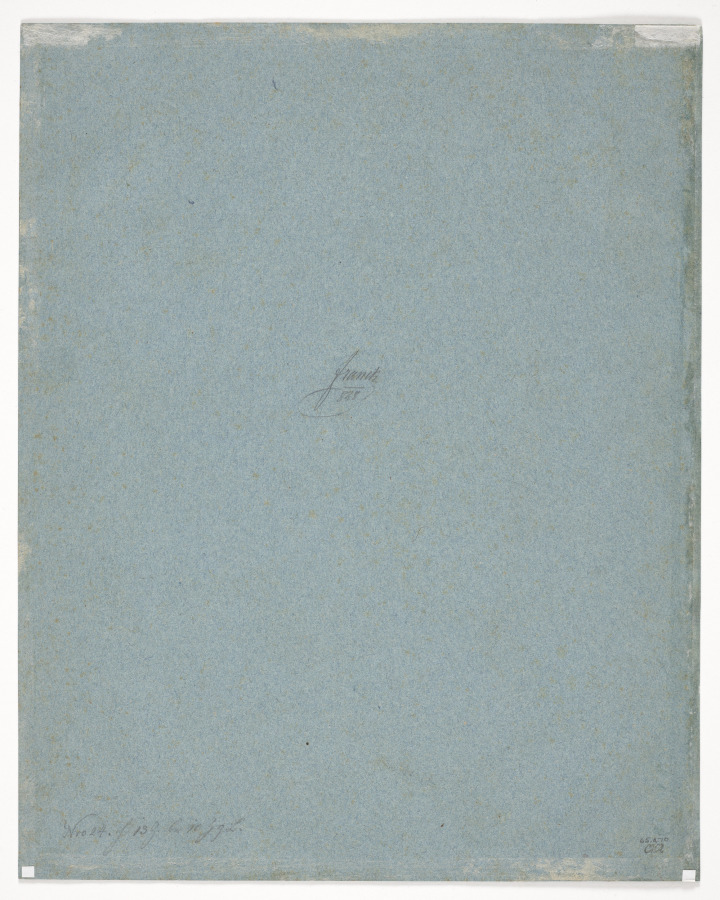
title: Arm of Eve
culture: Germany, Nuremberg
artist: Albrecht Dürer (German, 1471–1528)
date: 1507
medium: point of brush and gray and black wash, brush and gray and black wash, heightened with white gouache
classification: Drawing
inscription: signed, center right, in gray ink: 1507 / [artist monogram: AD]; verso, lower left, in graphite: Nro 24. F 13 z. [bn?] 10zgL.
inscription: Watermark: Anchor (similar to Briquet 461)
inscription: "franck / 828" in graphite, center verso (Lugt 946)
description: Arm of Eve is the only surviving preparatory drawing for Dürer’s life-size panels of Adam and Eve in the Museo del Prado, Madrid. It is also one of the few surviving drawings by the artist made on Venetian blue paper, a support he began to use for his chiaroscuro studies while visiting Venice in the winter of 1506–7. With extraordinary economy of means, using only black and gray ink and a limited amount of wash and gouache for shading and heightening, Dürer suggested the grace and balance of the complete human form in this composition of a disembodied arm and hand. Such a study of a hand in ideal proportions cannot help but suggest the hand of the artist, a self-referential nod to his own abilities.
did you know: The blue paper that Dürer used to make this drawing was a specialty of Venetian paper makers in the 16th century, who achieved the color by infusing the paper pulp with dyed fibers.